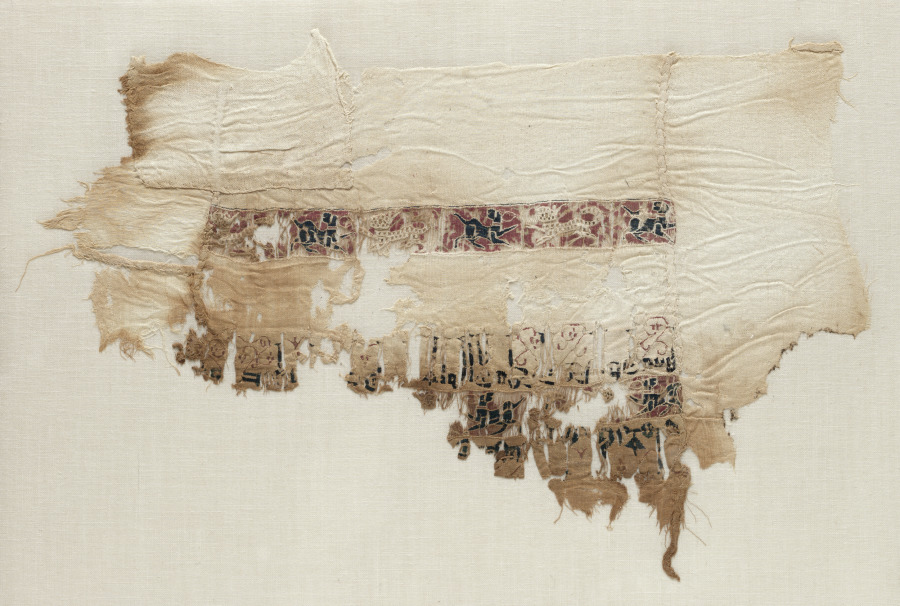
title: Fragment of a Tiraz, Inset from a Sleeve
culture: Egypt, Fatimid period, Caliphate of al-Mustansir, 1000s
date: 1048–58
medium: tabby ground with inwoven tapestry ornament; linen and silk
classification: Textile